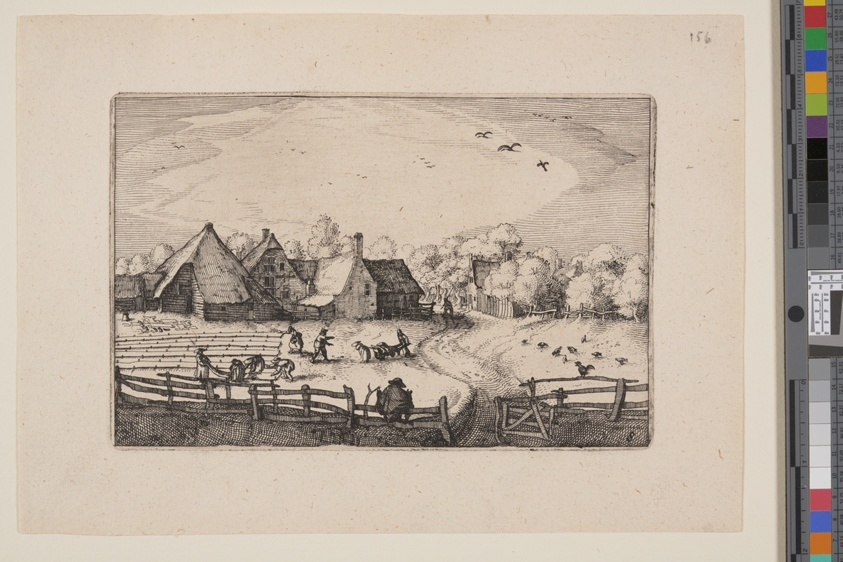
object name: Print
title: Bleaching-Fields Near the Haarlemmer Hout, from Views in the Surroundings of Haarlem (Plaisante Plaetsen)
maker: Claes Jansz. Visscher (Netherlandish, c. 1550–c. 1612)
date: 1610/20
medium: Etching on ivory laid paper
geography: Netherlands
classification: print; paper; prints and drawing; etching